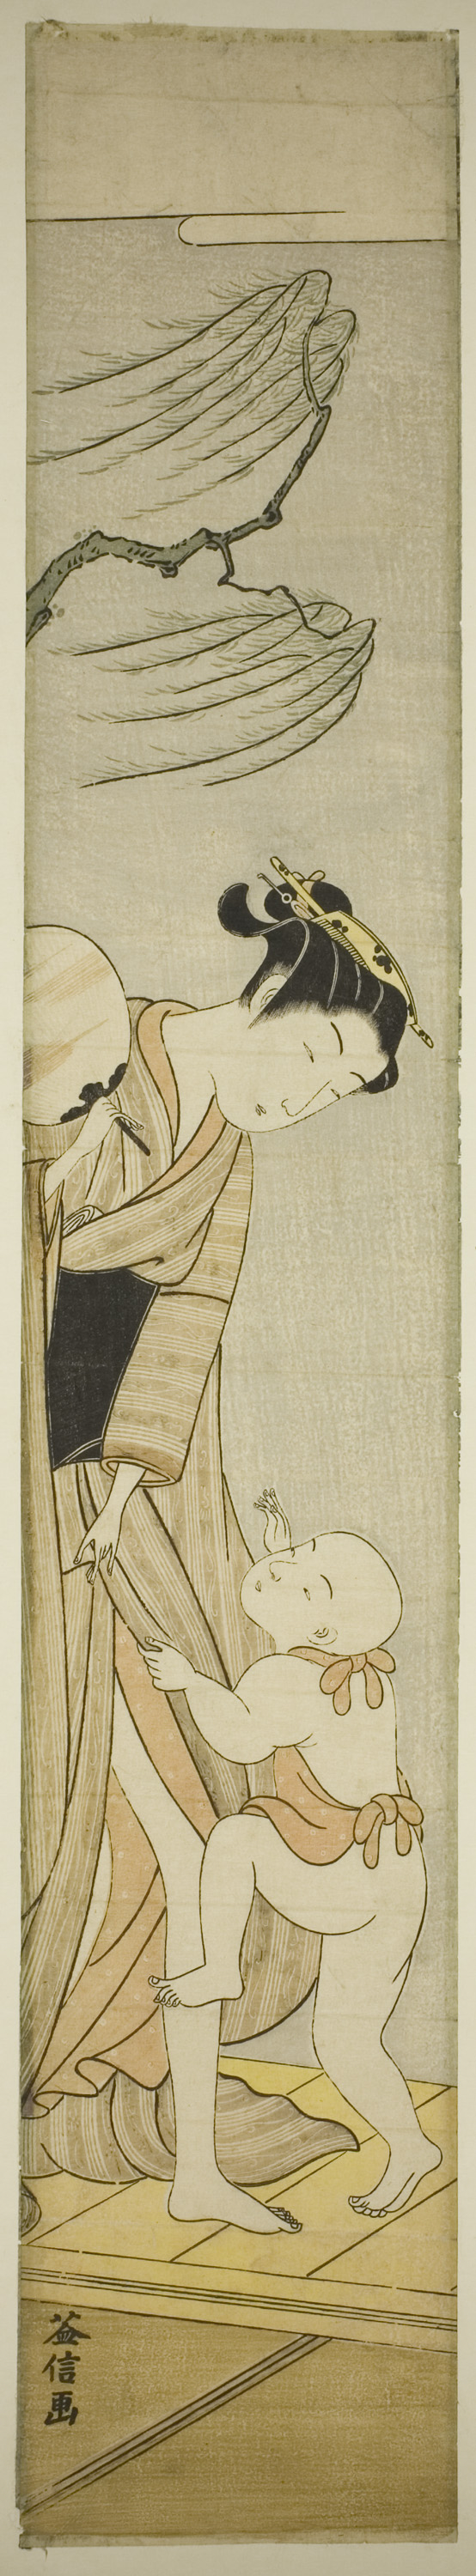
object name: Print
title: Young Woman and Boy on Veranda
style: Japanese (culture or style)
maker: Masunobu (Japanese, active c. 1764-72)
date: c. early 1770s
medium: Color woodblock print; hashira-e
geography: Japan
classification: woodblock print; print; asian art